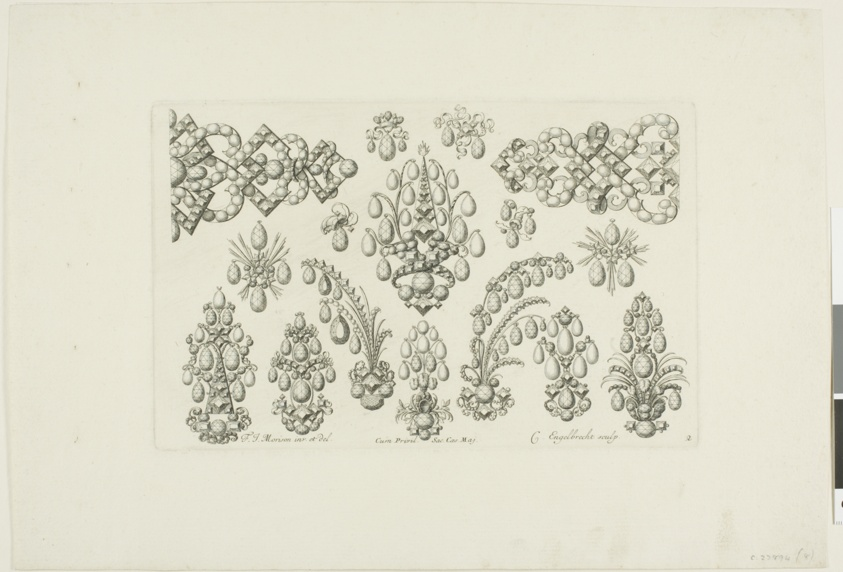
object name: Print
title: Designs for Jewelry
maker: Christian Engelbrecht (German, 1672-1735); after Friedrich Jacob Morisson (German, active 1693-1697)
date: before 1697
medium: Engraving on cream laid paper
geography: Germany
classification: engraving; print; prints and drawing